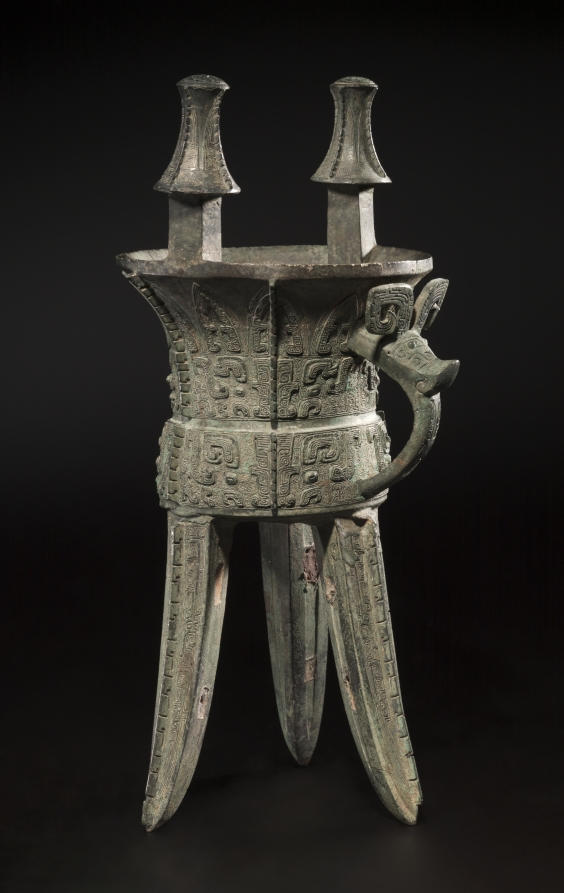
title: Wine Vessel (Jia)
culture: China, Shang dynasty (c. 1600–c. 1046 BCE), Anyang phase (c. 1250–1046 BCE)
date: c. 1250–1046 BCE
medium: bronze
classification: Metalwork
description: This large wine vessel (or jia) is among those very rare, monumental pieces uncovered from Anyang, the last royal capital of the Shang dynasty (c.1700–c.1100 BCE). Probably very few monumental bronze vessels were ever made; each of them must have cost a fortune and was used to designate high-ranking (often royal) status. Even fewer have survived. This wine vessel was used for the ancestral rites of the Shang. Its three splayed legs supported the cup over a fire, suggesting that the wine might be heated. Offering wine and food to their departed ancestors was an essential ritual practice performed by the Shang royalty and aristocracy. The Shang people believed that their ancestors were able to intercede with the high god to confer fruitful harvests and victories in battles. Their ritual actions involved communication with the supernatural realm (and this was further supported by the practice of divination with the use of a tortoise shell or a cattle shoulder blade). Here, the animal mask on the bronze vessel stares frontally at the viewer and serves symbolically as a messenger of communication with the ancestors. It conjures up the potency of mystery, whereas the static monumentality of the bronze vessel lends an air of dignified solemnity to the ritual ceremony.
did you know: Ancient bronze vessels are ritual and religious in nature, linked inextricably to political legitimization, and are source materials for Chinese historiography and traditional antiquarianism.